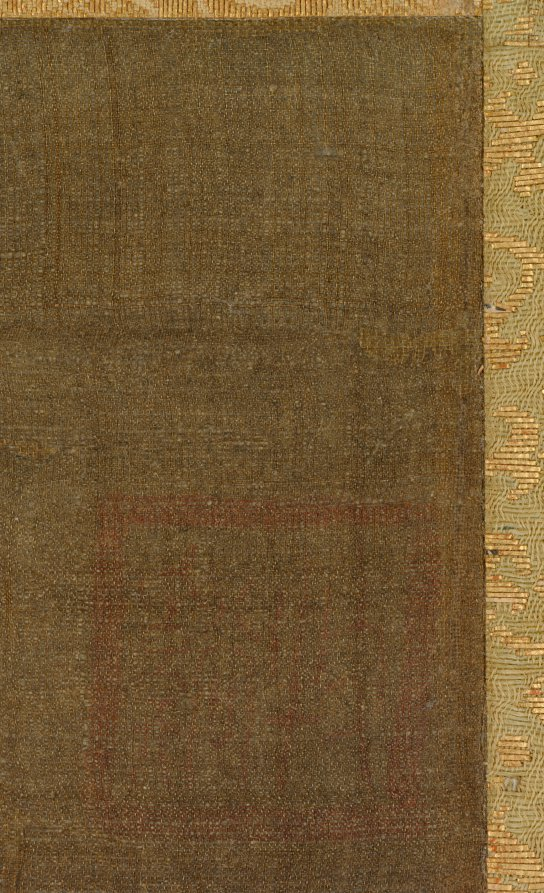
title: Dragon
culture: China, Southern Song dynasty (1127-1279)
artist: Fachang Muqi (Chinese, 1220–1280)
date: c. 1250–79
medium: Hanging scroll; ink on silk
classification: Painting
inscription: 道有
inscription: 雜華室印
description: The dragon and tiger are tied to the philosophical concept of yin and yang, which describes opposite but complementary forces. The dragon occupies a tiered background of waves and mist. Its luminous head emerges from the darker passages, and its narrow twisting body is serpent-like. By contrast, the close-up view of the tiger emphasizes its bulk. The tiger bends its head to lick its paw while its tail curls in the foreground. In their original Chan Buddhist context, this pair of scrolls likely flanked a central image, like the Bodhisattva Guanyin. The silk has darkened over the centuries, and the slight reddish shading in the tiger’s tongue and nose has faded.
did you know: Fachang Muqi was a Chinese Chan Buddhist monk and painter.